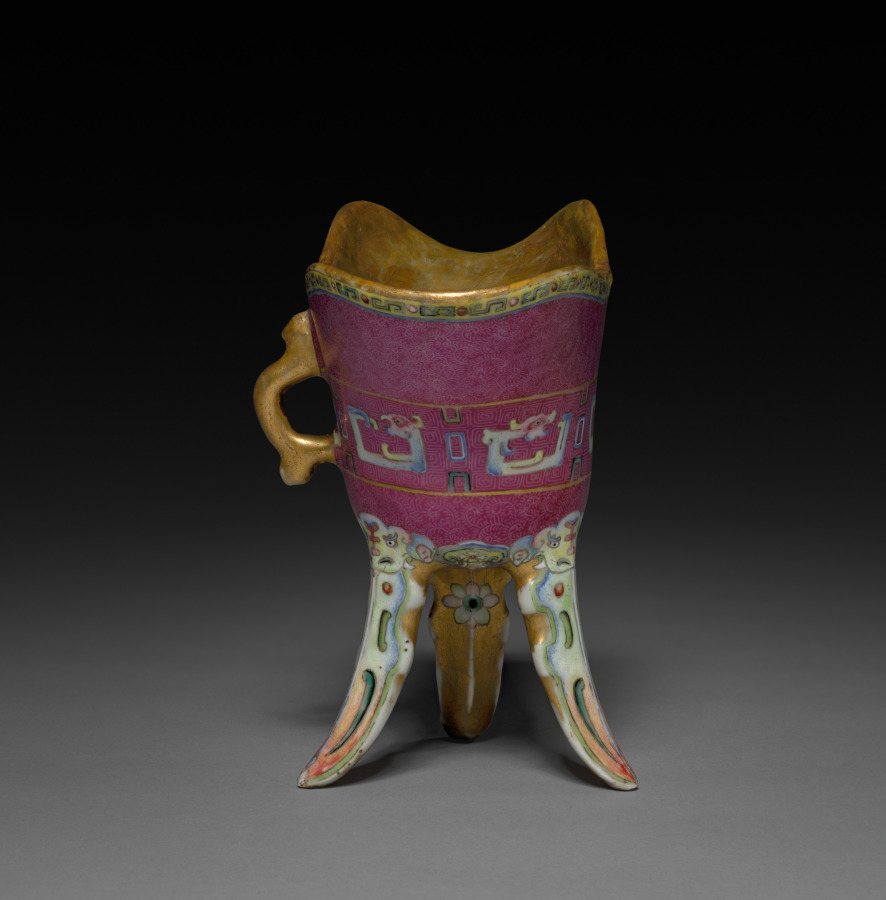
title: Libation Cup of Bronze Format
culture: China, Qing dynasty (1644-1911)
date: 1800s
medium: porcelain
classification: Ceramic